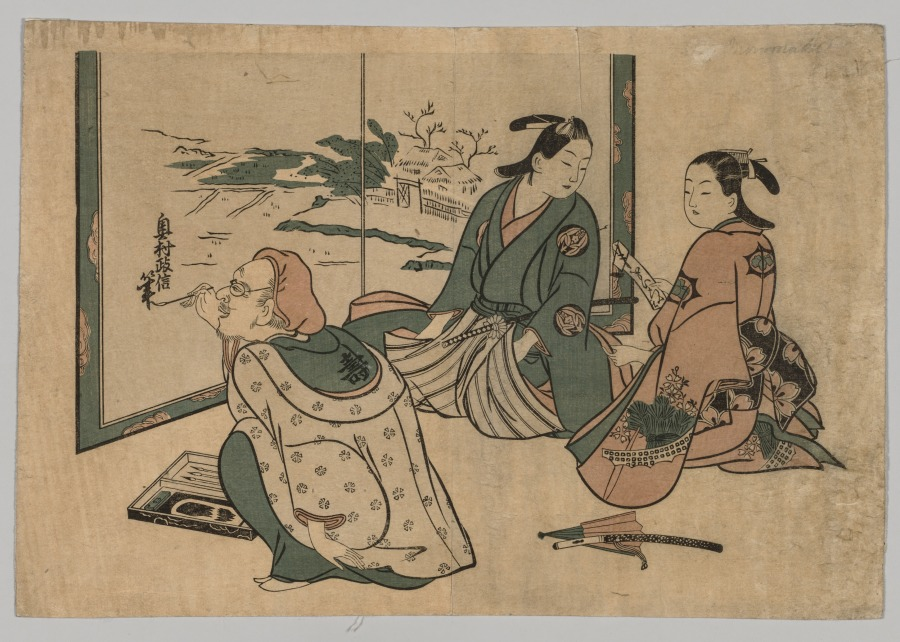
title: No Title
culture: Japan, Edo period (1615–1868)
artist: Okumura Masanobu (Japanese, 1686–1764)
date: 1742–1755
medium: color woodblock print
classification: Print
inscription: Signature: Okumura Masanobu, brush